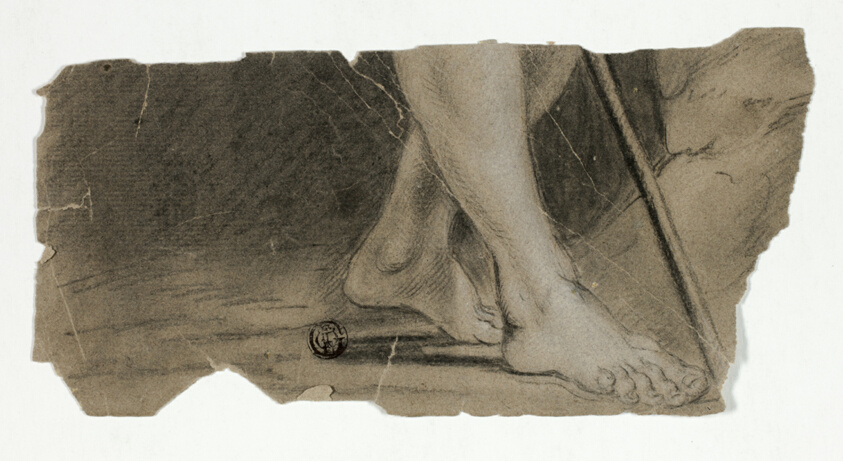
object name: Drawing and Watercolor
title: Feet of John the Baptist (fragment)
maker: Unknown Artist; European, 17th/19th century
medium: Charcoal on paper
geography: Europe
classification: charcoal; drawings (visual works); prints and drawing